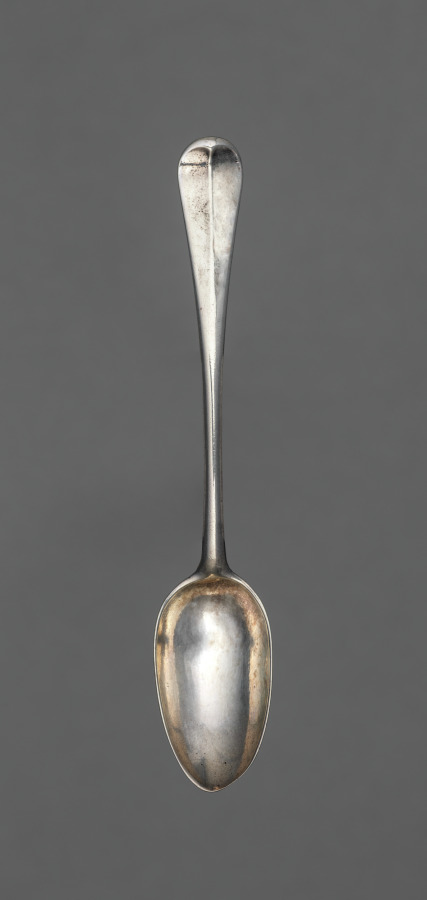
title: Teaspoon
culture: America, Pennsylvania, Philadelphia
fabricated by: Philip Syng (American, 1703–1789)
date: c. 1730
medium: silver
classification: Silver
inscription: engraved "L - R" in block letters on back of handle end.